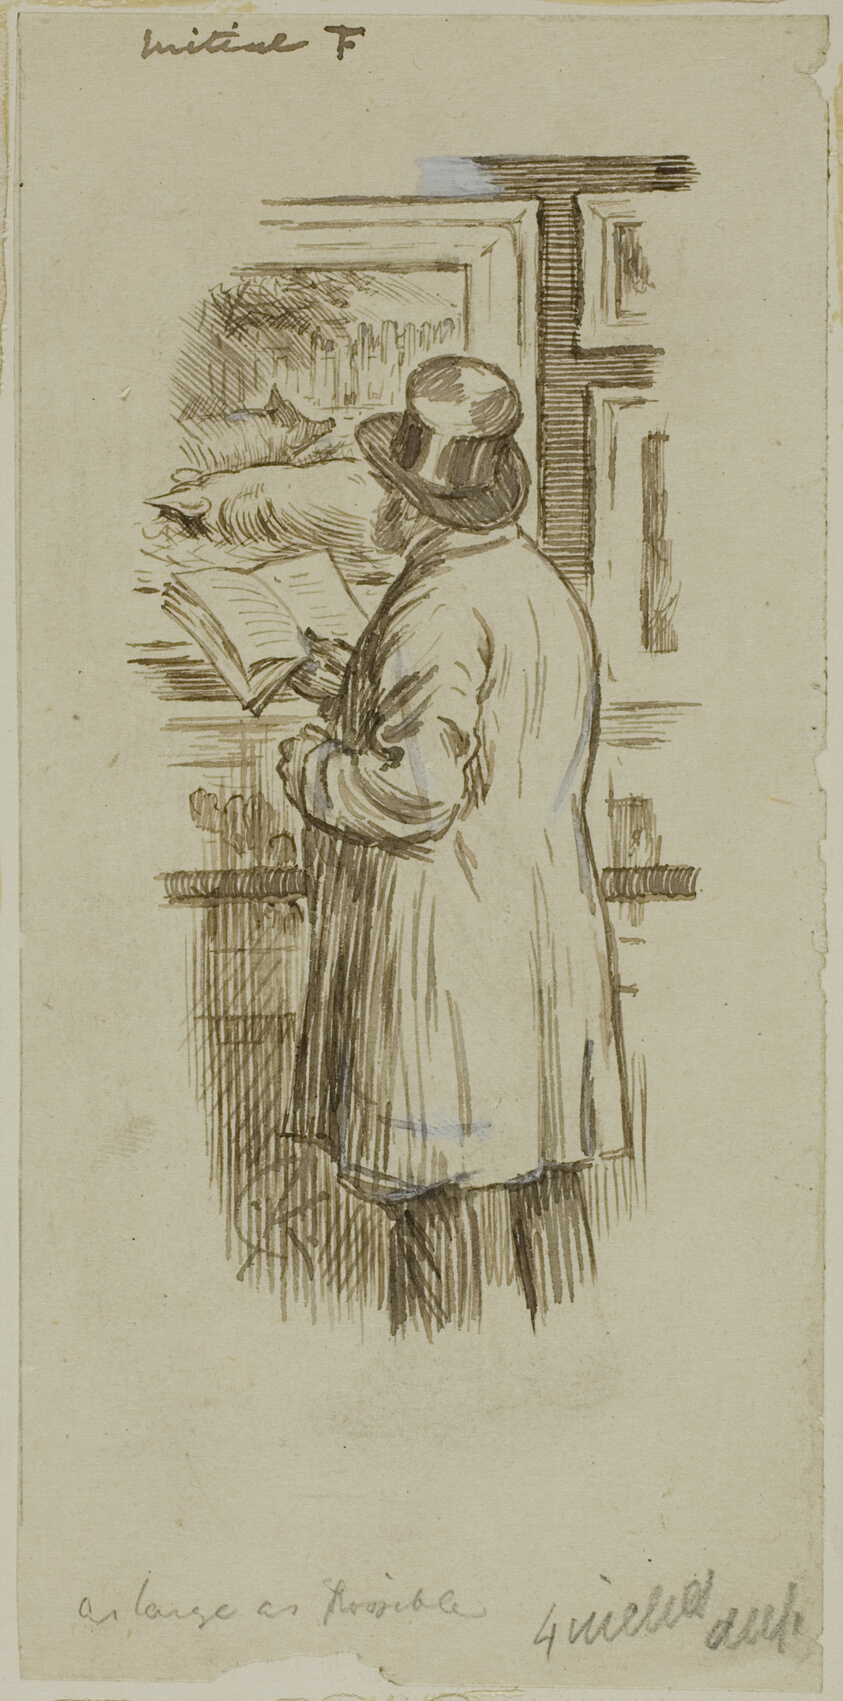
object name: Drawing and Watercolor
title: Man at Exhibition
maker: Charles Samuel Keene (British, 1823-1891)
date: 1870/91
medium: Pen and brown ink, with touches of white gouache, over traces of graphite, on buff wove paper, laid down on ivory wove card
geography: England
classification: pen and ink drawings; drawings (visual works); prints and drawing